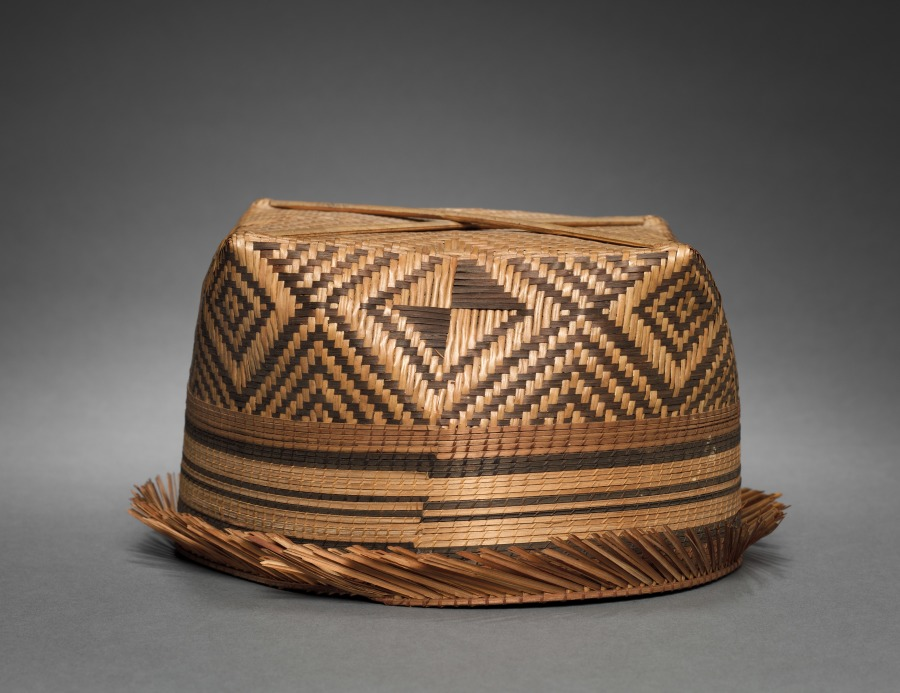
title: Hat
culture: Africa, Central Africa, Democratic Republic of the Congo, Mangbetu-style maker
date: by 1928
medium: Plant fibers and dye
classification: Garment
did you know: This woven hat looks brand new because it was one of the many items the business-savvy chief of Ekibondo had artists and artisans make for the foreigners who passed through his village.